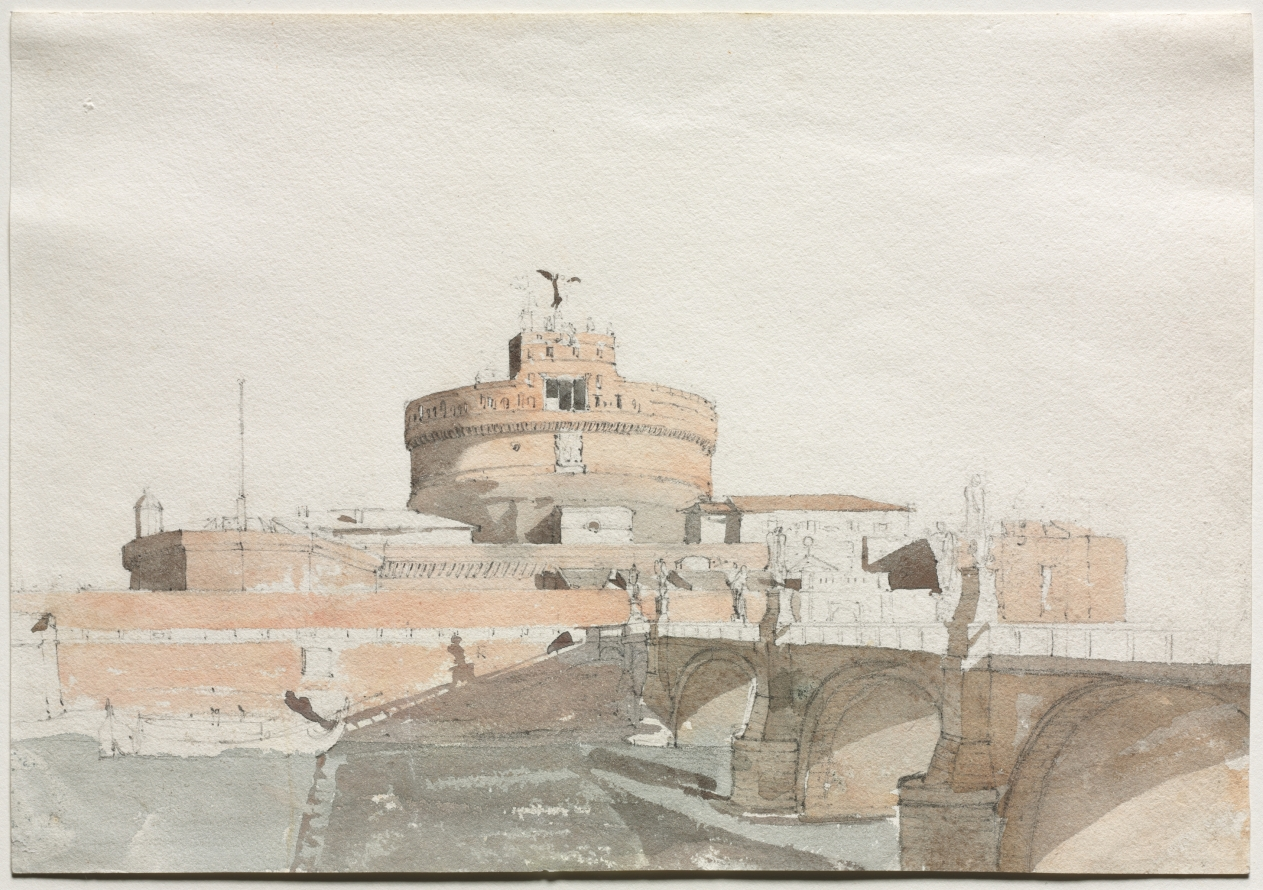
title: Castel Sant' Angelo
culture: Austria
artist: Thomas Ender (Austrian, 1793–1875)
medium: pencil and watercolor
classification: Drawing